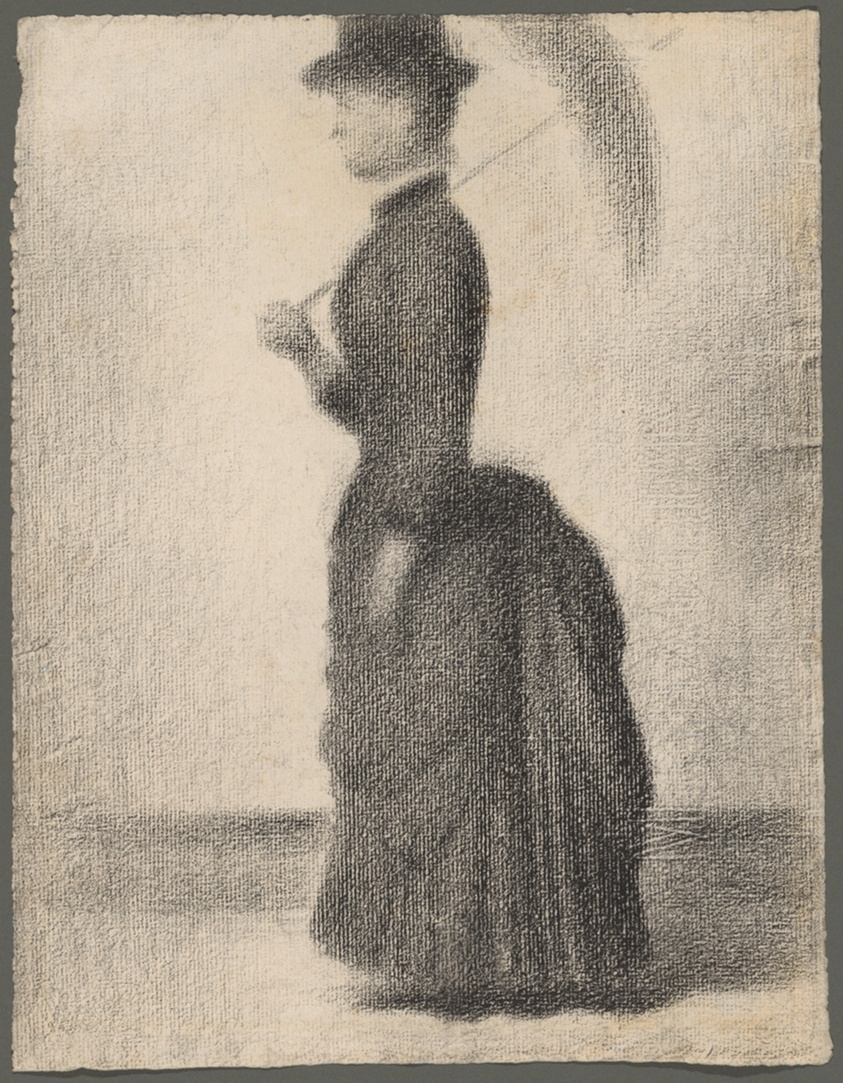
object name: Drawing and Watercolor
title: Woman Walking with a Parasol (study for La Grande Jatte)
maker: Georges Seurat (French, 1859-1891)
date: 1884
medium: Conté crayon on cream laid paper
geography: France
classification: conté crayon; drawings (visual works); prints and drawing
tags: study